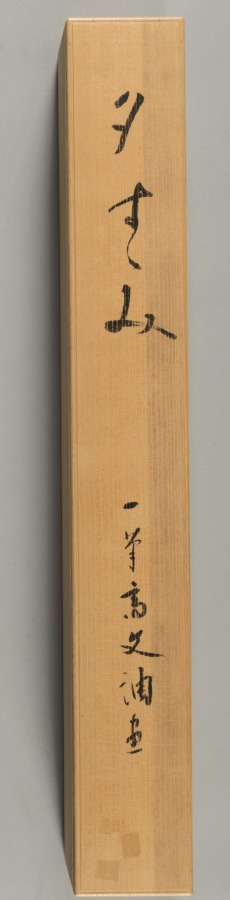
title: Beauties at the Seashore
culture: Japan, Edo period (1615–1868)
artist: Ippitsusai Bunchō (Japanese, active c. 1765–92)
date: c. 1765–92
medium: hanging scroll; ink and color on paper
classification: Painting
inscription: Undeciphered, severely faded seal in lower right corner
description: Bunchō portrays the popular subject of cooling off by the water on a late spring or early summer evening, as suggested by the willow. The seated lady enjoys her pipe-smoking—a popular pastime for Edo women. In the background, some fireworks are set off from a small boat.